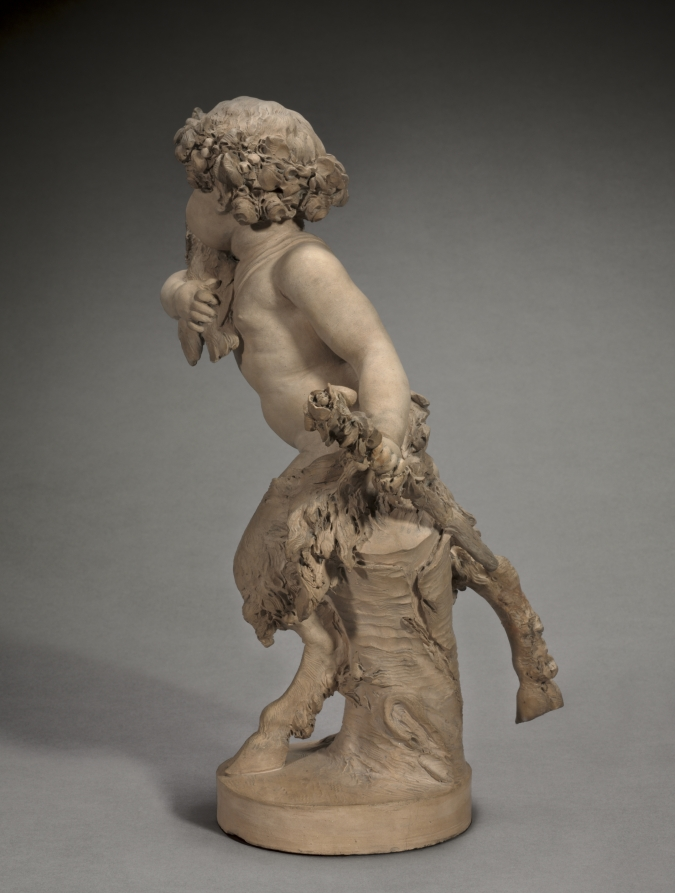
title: Young Satyr Running with an Owl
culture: France, 18th century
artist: Clodion (French, 1738–1814)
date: 1770s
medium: terracotta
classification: Sculpture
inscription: signature incised on back: CLODION.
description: These works by French sculptor Claude Michel, known as Clodion (1738–1814), shows a pair of young satyrs. Clodion was fond of depicting characters from classical antiquity in his work, and the subject of child or baby satyrs in Bacchanalian celebrations appear often in the work of Rococo artists. The female satyr wraps a plump arm around a nest filled with baby birds, while her male counterpart holds an owl. Balancing on one foot, the two flee the scene of their theft.